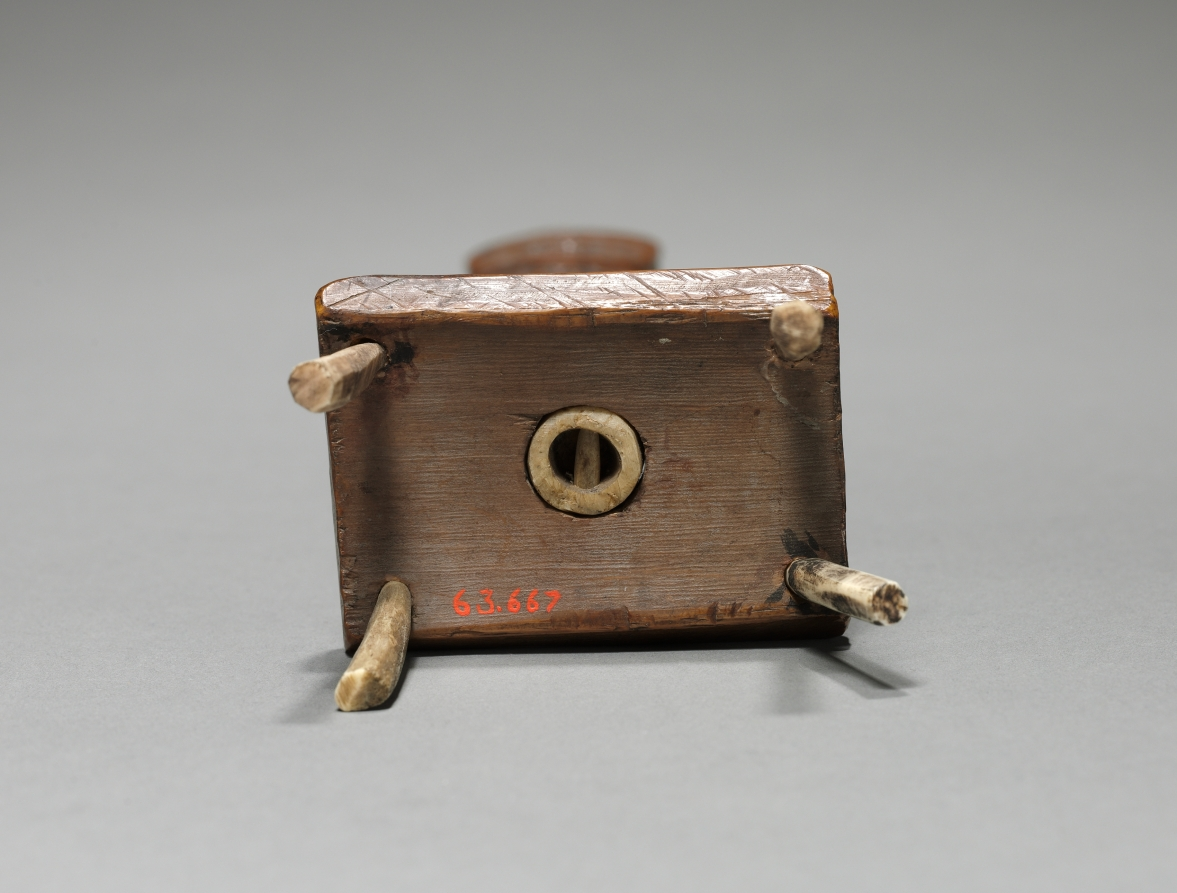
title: Totem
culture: America, North American Indian, Alaska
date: 20th century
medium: wood and bone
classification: Furniture and woodwork